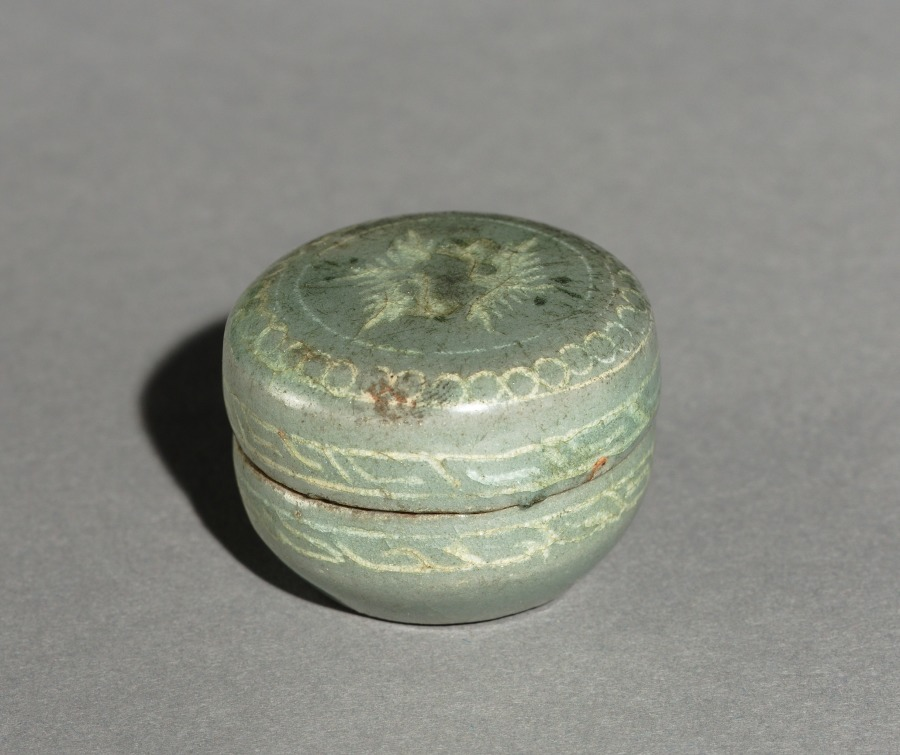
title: Box and Cover with Inlaid Crane Design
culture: Korea, Goryeo dynasty (918–1392)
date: 1200s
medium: celadon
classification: Ceramic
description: Celadons, spoons, seals, and bronze mirrors were the most common burial objects in tombs during the Goryeo period (918-1392). Once used to contain color powder, rouge and eyebrow gel for makeup, this small container was one of the standard goods that furnished elites' tombs. Goryeo-period women and men used the grain powder of rice or millet for whitening their skin, safflower extract for rouge, and plant ash or soot for eyebrow gel. Yet, natural-looking make-up seems to have been the most favorable one in Korea according to the travelogue by Xu Jing (1091-1153), the Chinese diplomat who visited Korea in 1123.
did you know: This ceramic container was used to store either incense or cosmetics.